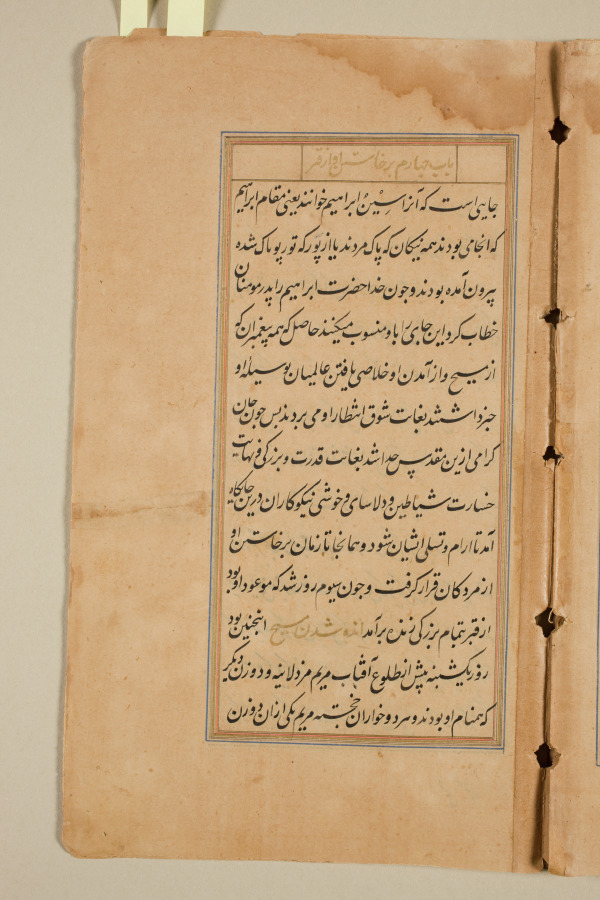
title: Text page from a Mirror of Holiness (Mir’at al-quds) of Father Jerome Xavier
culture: Mughal India, Allahabad, made for Prince Salim (1569–1627)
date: 1602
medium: Ink and gold on paper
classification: Manuscript